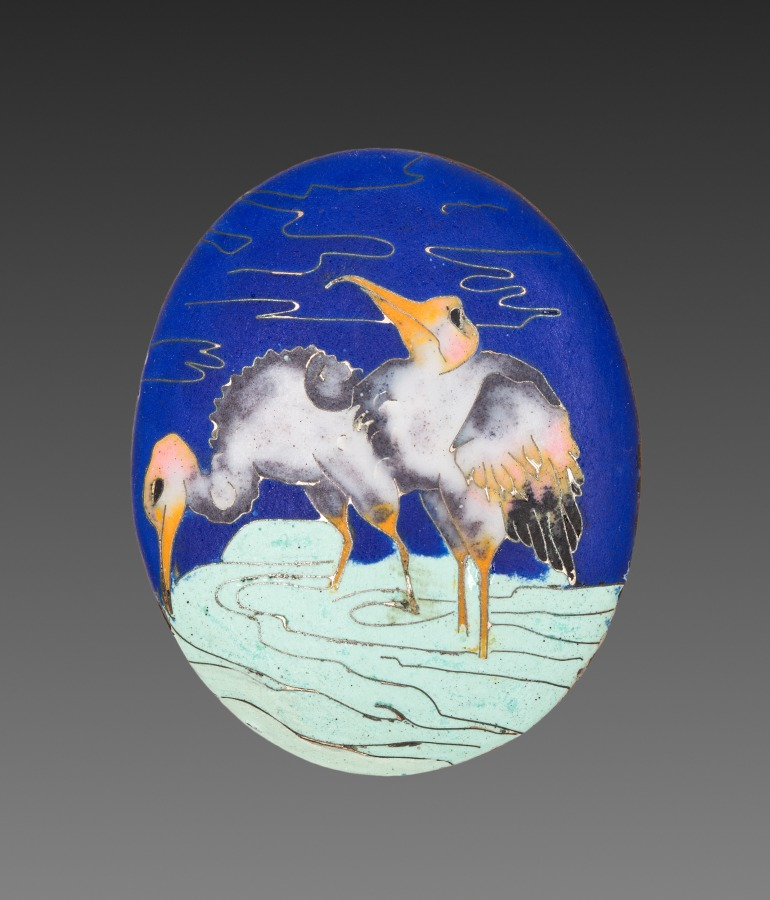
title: Locket Panel (3 of 4)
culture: France, 19th century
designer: Alexis Falize (French, 1811–1898)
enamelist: Antoine Tard (French, active 1860–1889)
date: 1800s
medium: gold and cloisonné enamel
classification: Jewelry